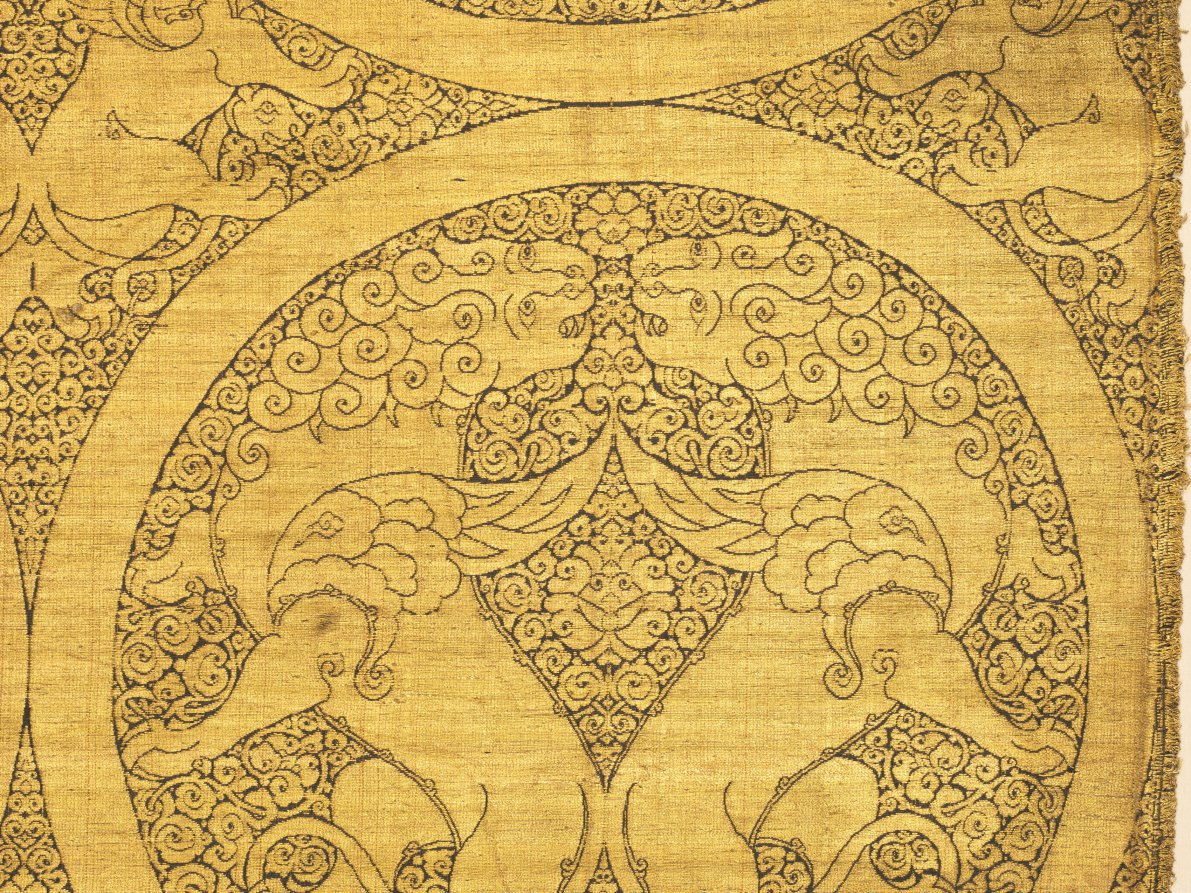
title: Cloth of gold with winged lions and griffins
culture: Central Asia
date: 1225–75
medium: Silk and gold thread: lampas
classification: Textile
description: The Mongols created exceptionally sumptuous cloths of gold to symbolize their imperial authority and legitimacy, this being the most resplendent example known. Opulent expanses of gold thread enrich the roundels, lions, and griffins in striking contrast with the intricate brown silk foliate ground. The pattern integrates motifs from Iran—paired lions in roundels and paired griffins—and from China, cloud ornaments on the lions’ wings. They suggest it was woven in an imperial workshop in Central Asia where Iranian and Chinese craftsmen worked together with local artisans. The gold is on a paper substrate associated with Asia, whereas animal skin substrates were used in Islamic lands. It is woven in a new technique developed by Iranian weavers, a combination of two weaves known as lampas, which was adopted internationally.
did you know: The tail of each paired griffin passes between its hind legs, loops around a rosette, and terminates in a feline head.